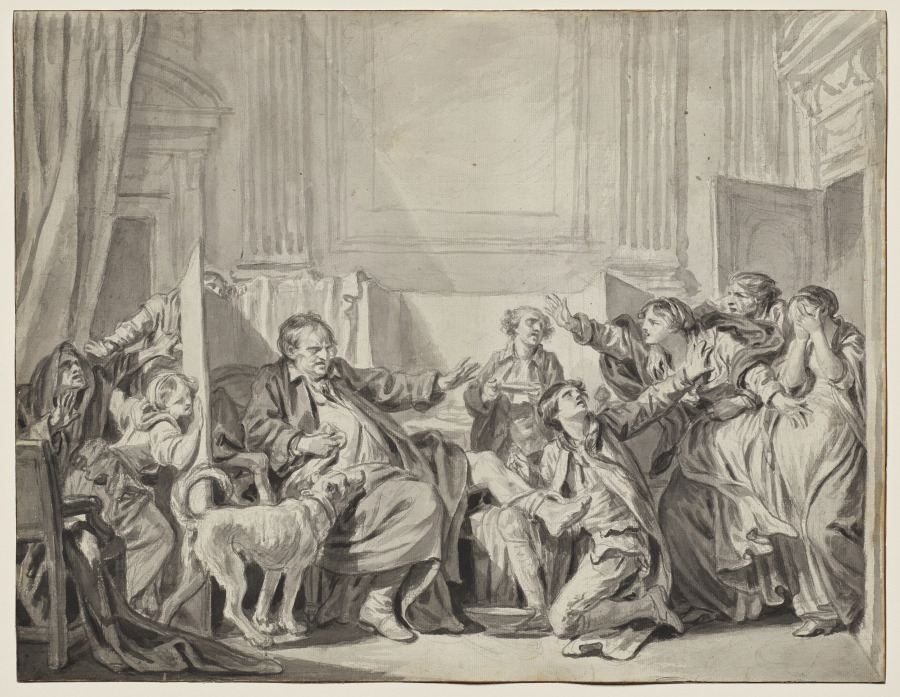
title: The Guilty and Repentant Daughter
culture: France, 18th century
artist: Jean-Baptiste Greuze (French, 1725–1805)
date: early 1770s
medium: brush and black and gray wash over black chalk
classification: Drawing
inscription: secondary support, upper center, in graphite: 60_ x 78 / vue du cadre [upside down]; on 19th-century backing of old frame, upper center, in black ink: Cabinet de Mr Clu Magne; upper center, in brown ink: La fille Coupable et Repentante / Déssiné par J. B. Greuze [overlined and underlined]; center, in black ink: M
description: This drawing belongs to a group of highly finished drawings created by Jean-Baptiste Greuze during the 1770s, many of which focused on family crises and were characterized by groups of figures set in shallow interior spaces. Although the precise subject of the work is unknown, it shows a father and his son kneeling before him. The title, which comes from an inscription on the drawing's original frame, refers to the girl entering the room at right, who is presumably disgraced due to a pregnancy out of wedlock. She is preceded by a woman who angrily confronts the family, gesturing to the girl's swollen stomach, perhaps accusing either the old or young man of impregnating the girl.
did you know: The man who served as the model for the father in Greuze's drawing also appears as a butcher in another sheet by the artist.